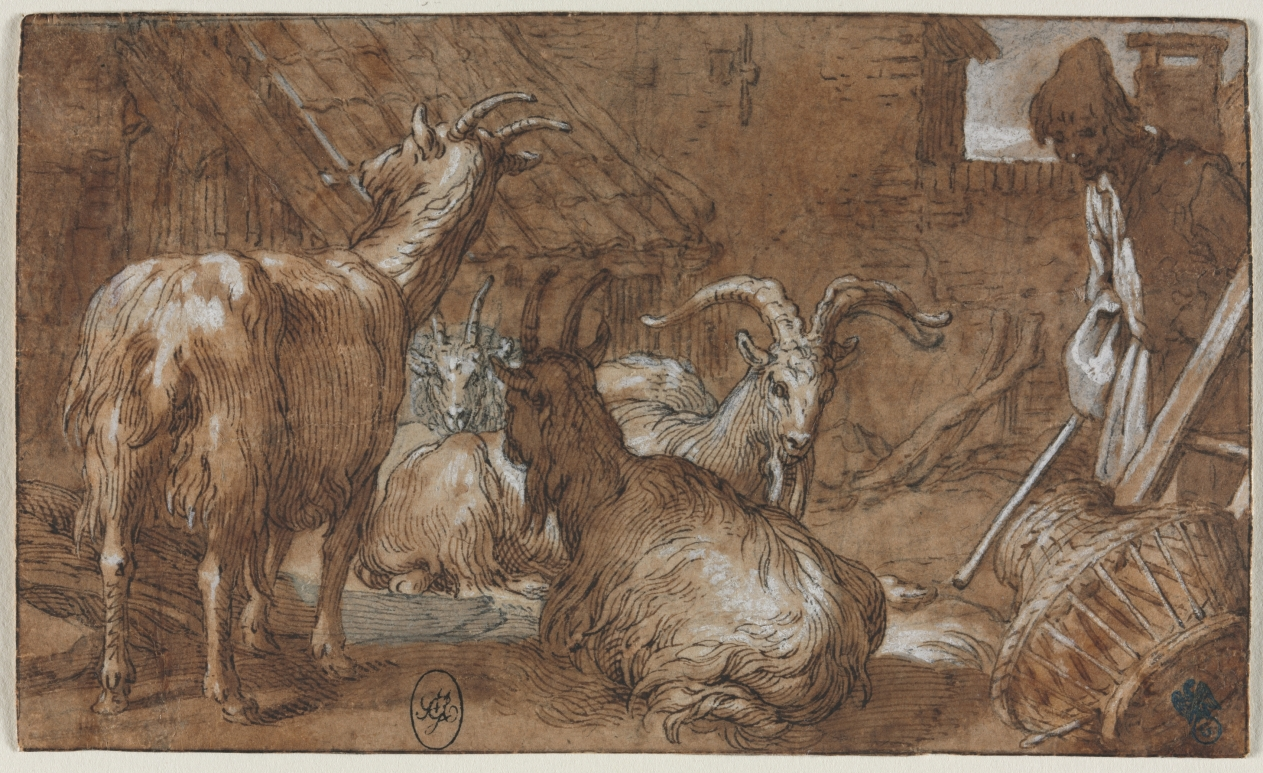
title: A Barnyard with Goats and a Goatherd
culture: Netherlands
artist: Abraham Bloemaert (Dutch, 1566–1651)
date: c. 1610–15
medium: pen and brown ink, brush and brown wash over black chalk, heightened with white gouache; framing lines in brown ink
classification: Drawing